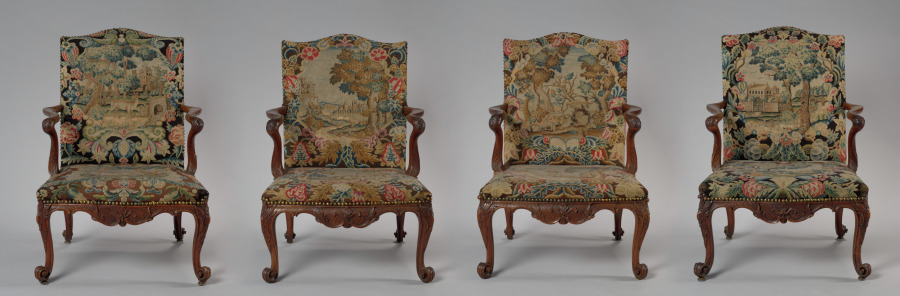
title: Set of Four Armchairs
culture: England, 18th century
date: 1760–1765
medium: mahogany upholstered in needlework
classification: Furniture and woodwork